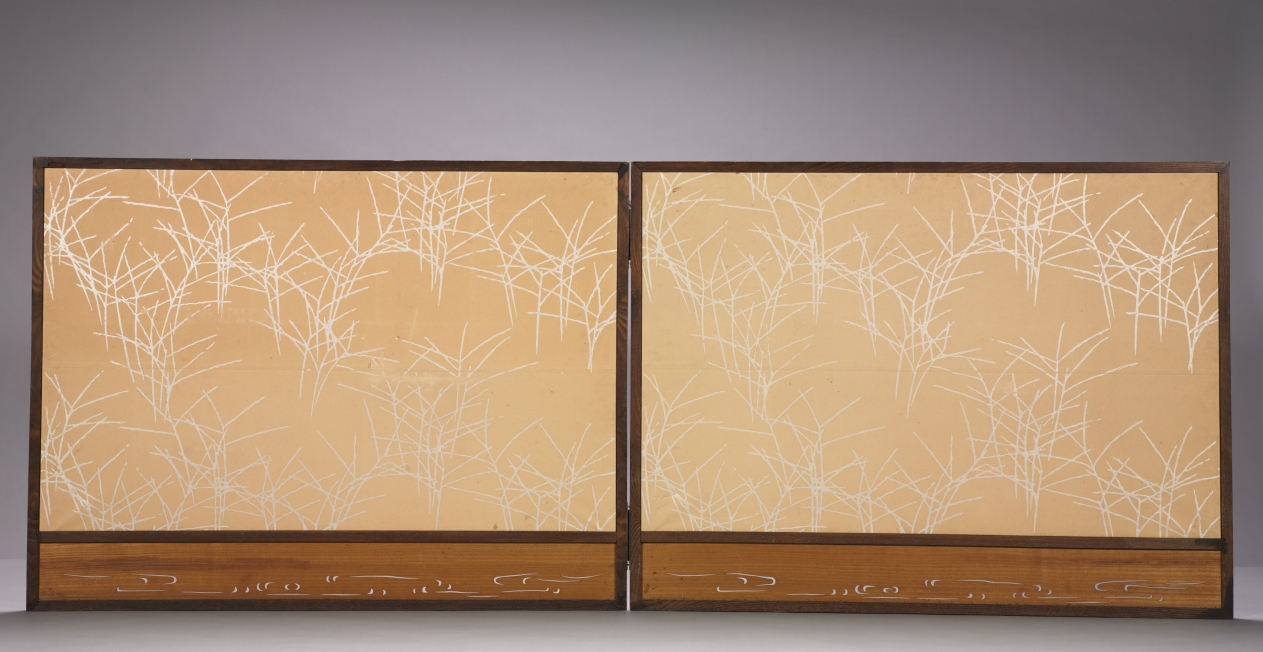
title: Fish in a Lotus Pond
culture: Japan, Edo period (1615–1868)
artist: Ōhara Donshū (Japanese, d. 1857)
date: 1800s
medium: two-fold screen; ink and color on silk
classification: Painting